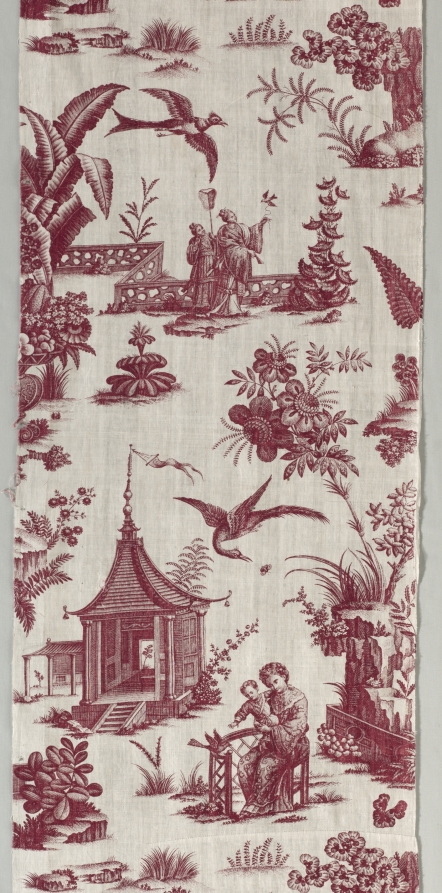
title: Copperplate-Printed Cotton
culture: England, Chambers, 18th century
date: 1700s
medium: copperplate printed cotton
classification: Textile